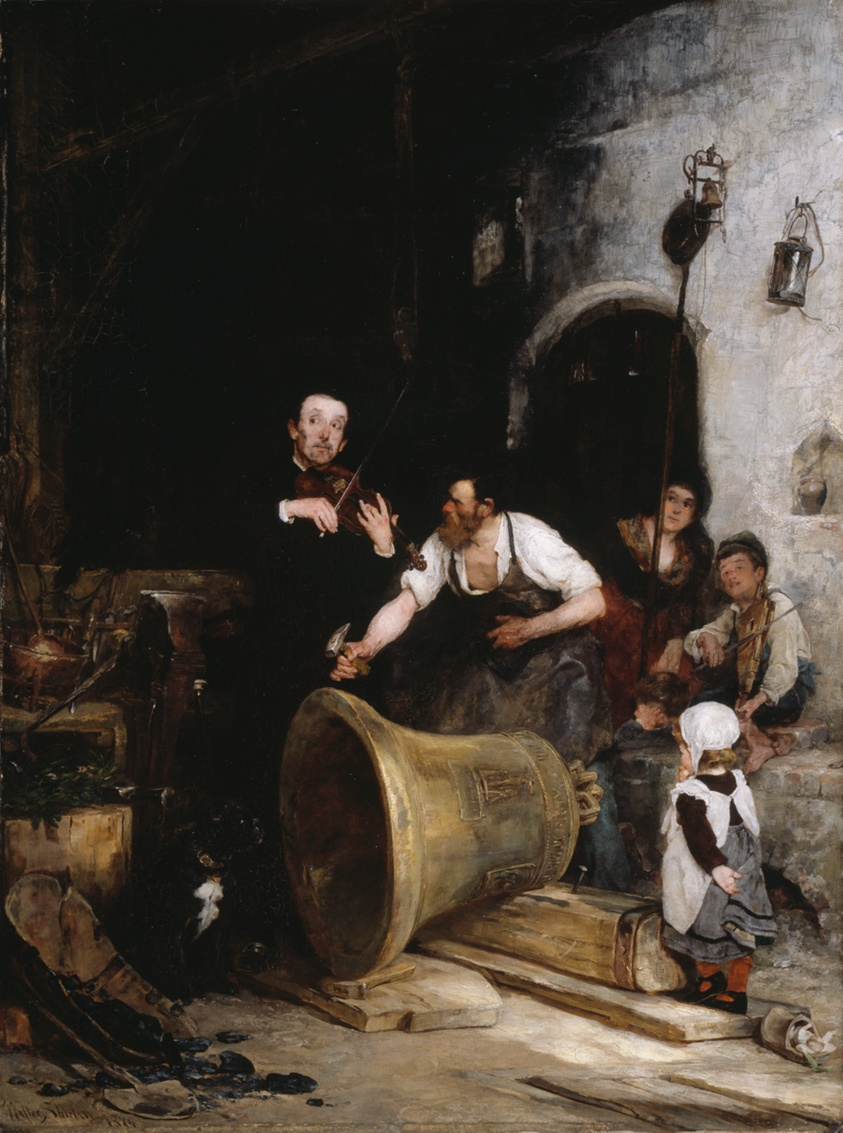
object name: Painting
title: Toning the Bell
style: Realism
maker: Walter Shirlaw (American, born Scotland, 1838–1909)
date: 1874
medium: Oil on canvas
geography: Munich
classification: painting; american arts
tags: Chicago, people, portraits